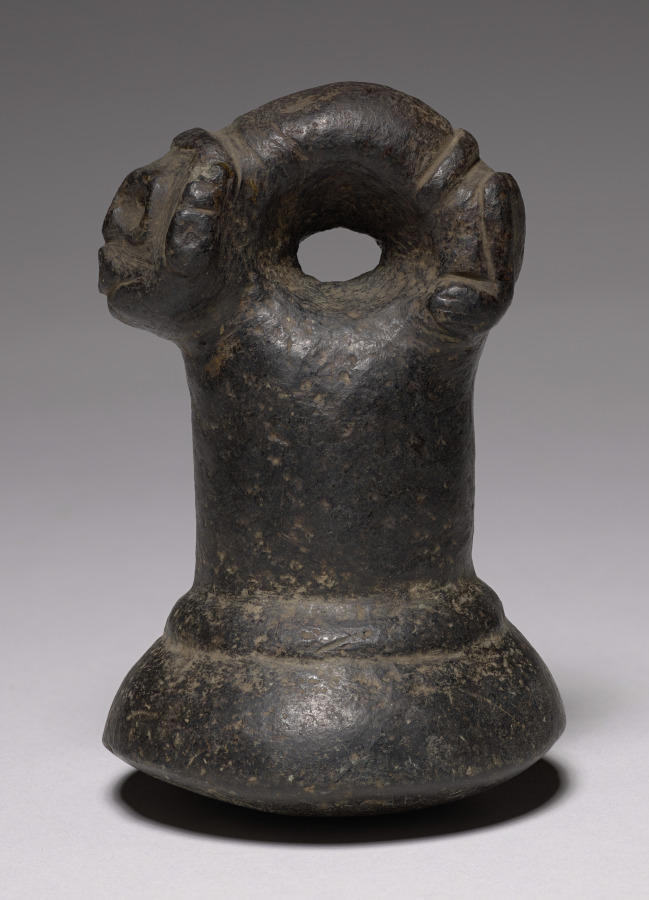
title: Pestle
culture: West Indies, Arawak (?), 15th century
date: 1400s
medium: stone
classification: Sculpture